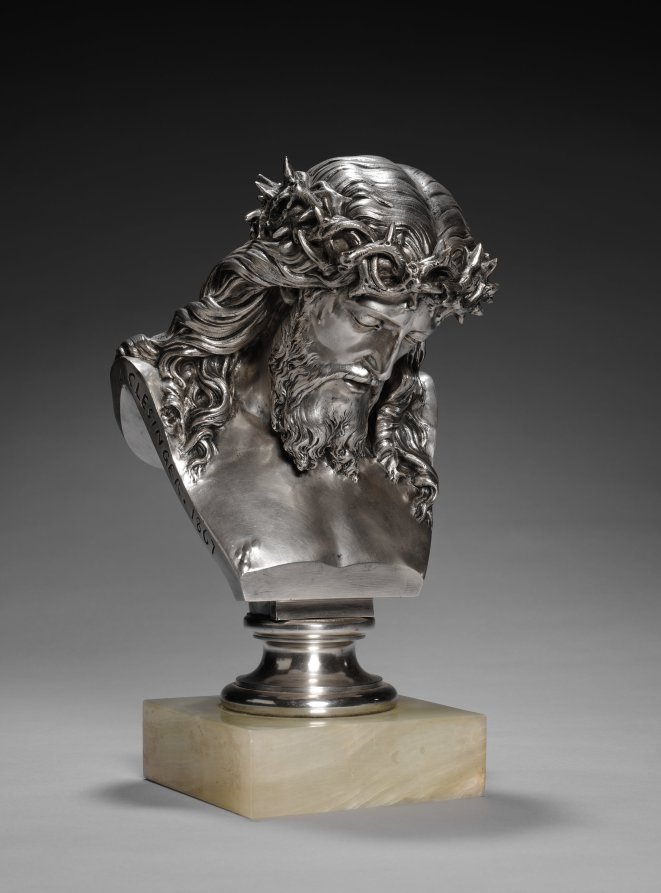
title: Head of Christ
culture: France, 19th century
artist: Jean-Baptiste Clésinger (French, 1814–1883)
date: 1867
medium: silvered bronze, marble base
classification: Sculpture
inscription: Signed in cut of right proper shoulder: "J. Clesinger, 1867"; inscribed in cut of left proper shoulder: "POUSSIELGUE RUSAND PARIS"; struck immediately above circular base: "17662"